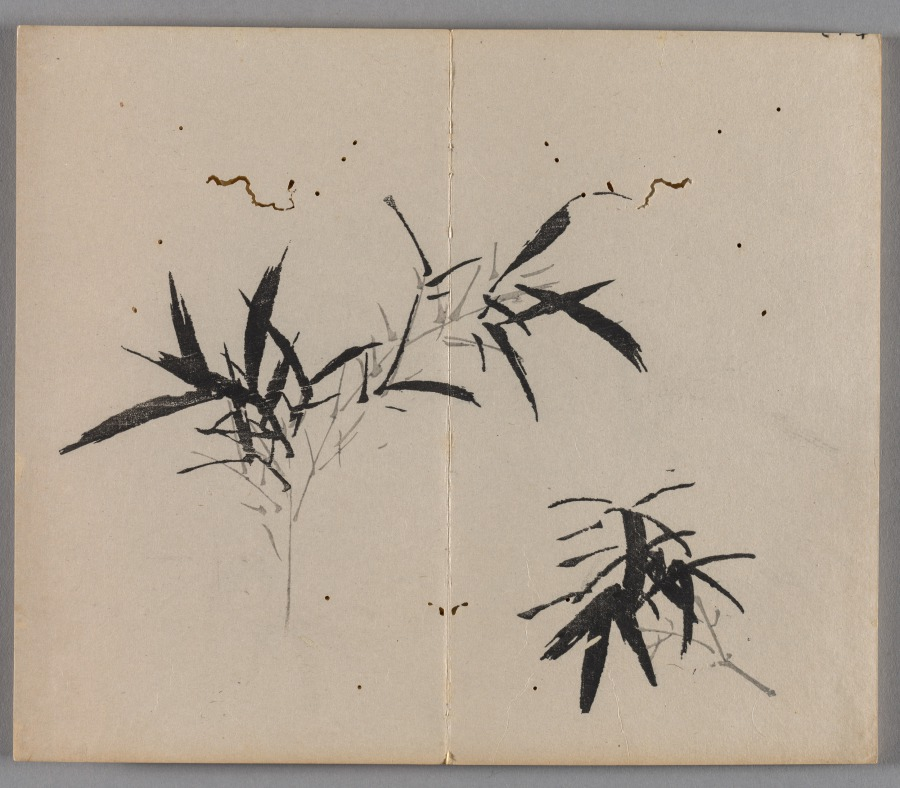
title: Ten Bamboo Studio Painting and Calligraphy Handbook (Shizhuzhai shuhua pu): Orchids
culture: China, Qing dynasty (1644-1911)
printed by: Hu Zhengyan (Chinese, c. 1584–1674)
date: 1633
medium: Woodblock-printed book; ink and colors on paper; first edition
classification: Print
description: Color printing reached a level of perfection in the early 1600s, as seen in this Ten Bamboo Studio Collection of Calligraphy and Painting and the Mustard Seed Garden Manual of Painting (printed 1679 and 1701). The painterly quality, precision in registering (aligning) the woodblocks, and harmonious colors made them the most successful color print editions in Chinese history. Both editions were printed and compiled in Nanjing, spread nationwide, and had a great impact on the arts in Japan and Korea.